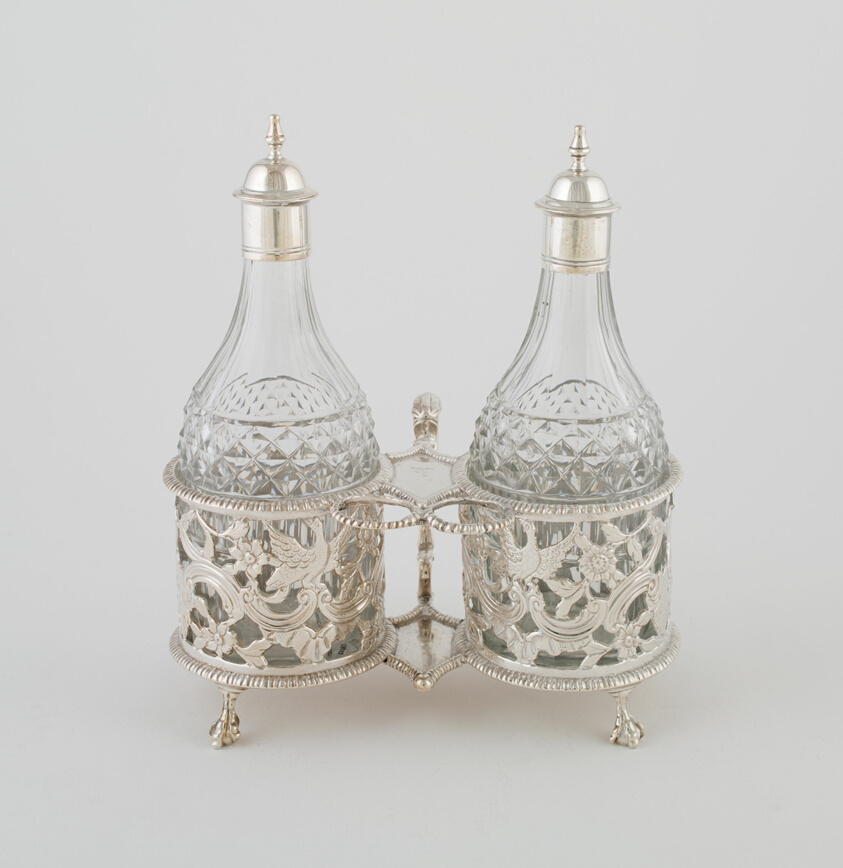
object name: Metalwork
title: Cruet Set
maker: Thomas Williamson; Irish, active 1750-70; Dublin, Ireland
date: c. 1760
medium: Silver and glass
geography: Dublin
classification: silver; metalwork; european decorative arts